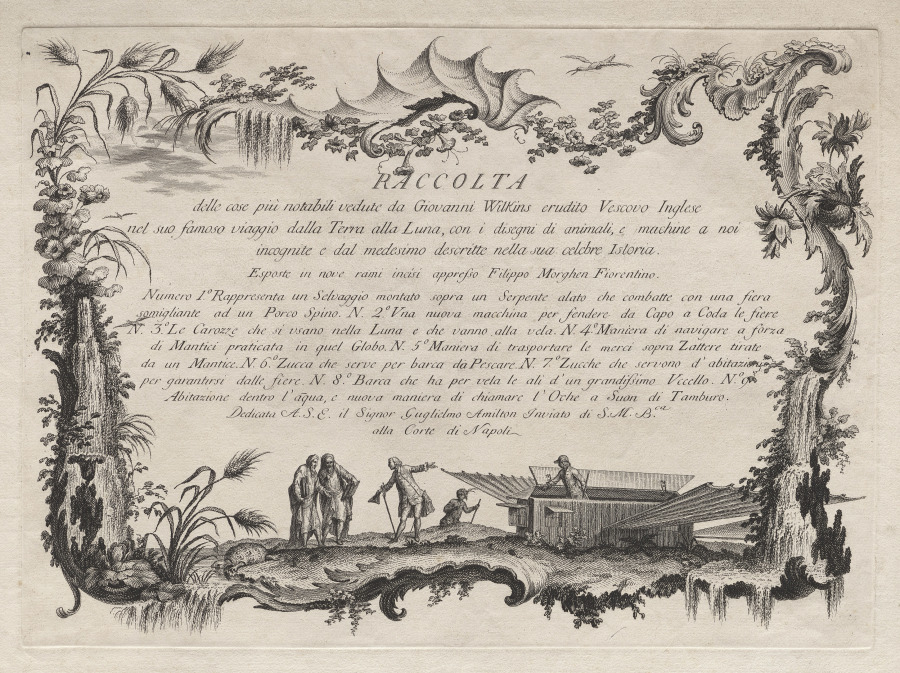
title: Title and Dedication Page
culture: Italy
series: Suite of the Most Notable Things Seen by John Wilkins Erudite English Bishop during His Famous Voyage from the Earth to the Moon … dedicated to Sir William Hamilton ambassador to the Court of Naples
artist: Filippo Morghen (Italian, 1730–after 1807)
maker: possibly after Jean-Pierre-Louis-Laurent Hoüel (French, 1735–1813)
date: about 1769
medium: etching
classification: Print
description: Filippo Morghen’s set of 10 etchings is outstanding among visual narratives of imaginary voyages to the moon, both visual and literary, that intrigued 18th-century European audiences. A title page and nine plates depict the imagined lives and economy of moon dwellers. These include modes of transport such as large birds and sailboats propelled by giant bellows, enormous scissors for capturing wild beasts (including an oversized rat), and the use of giant pumpkins as fishing boats and as dwellings. Representations of the moon dwellers are based on inaccurate and imaginary European interpretations of Asian, Ottoman, and Native American cultures—called chinoiserie and turquerie—that permeated the decorative and visual arts of the period.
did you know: Morghen based this print series on three books dedicated to moon exploration, including Bishop Francis Godwin’s Man in the Moone of 1640.